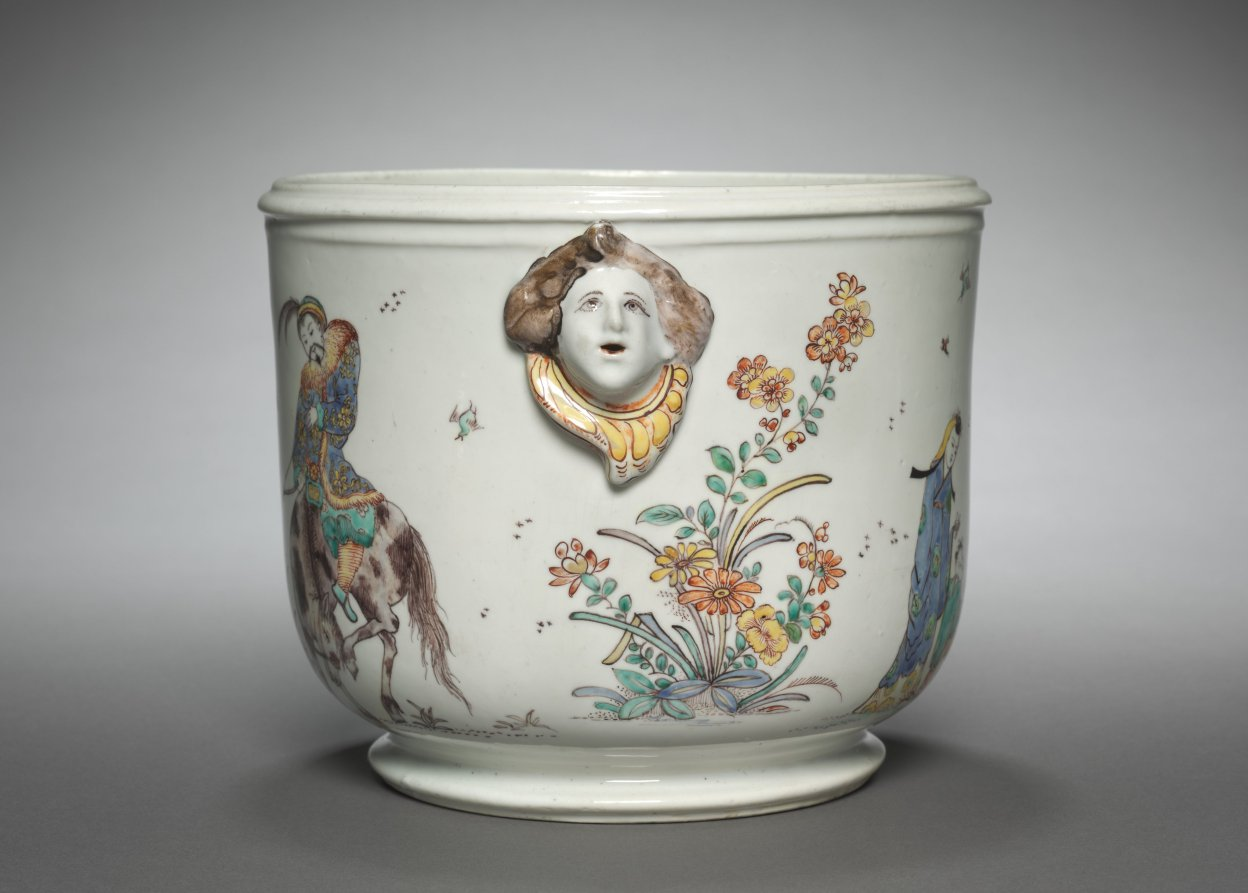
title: Bottle Cooler (seau à bouteille)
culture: France, Mennecy, 18th century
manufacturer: Mennecy- Villeroy Factory (French)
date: c. 1755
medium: Tin-glazed soft-paste porcelain with enamel decoration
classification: Ceramic